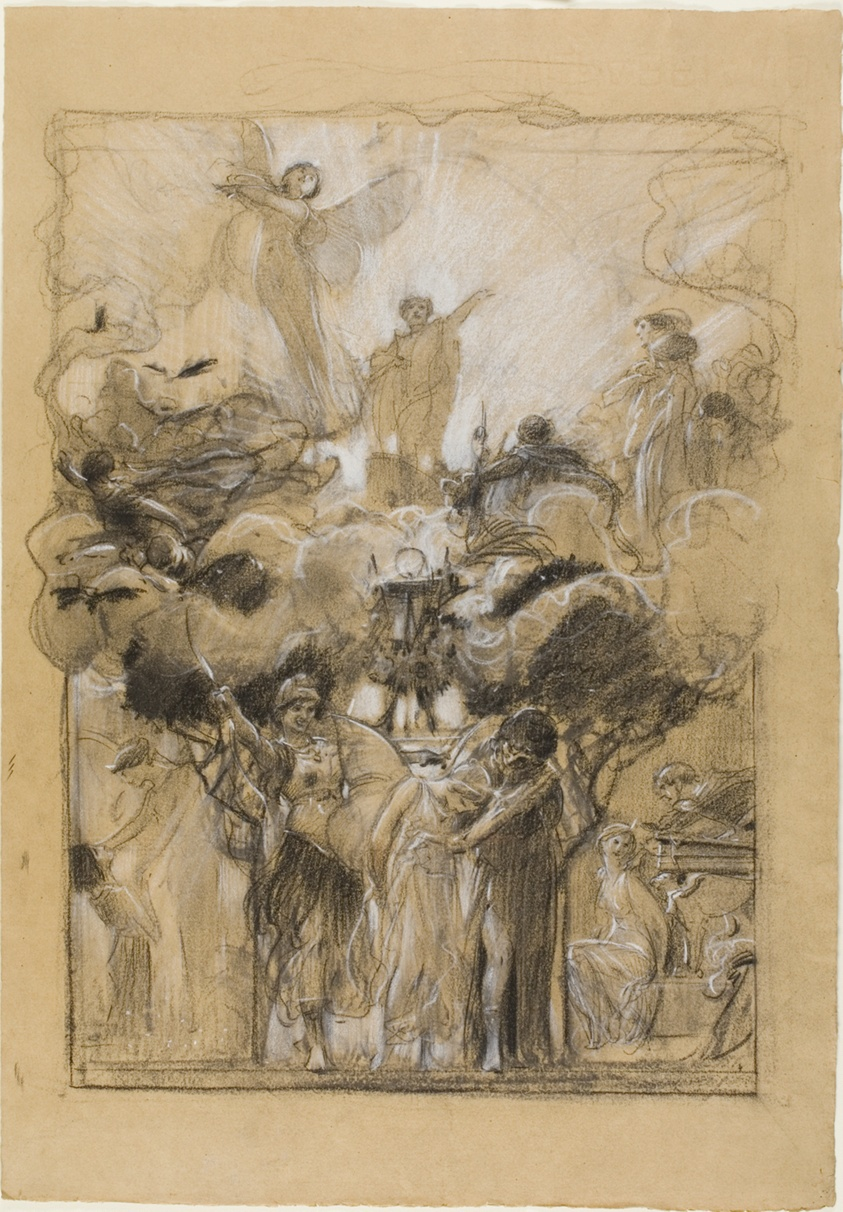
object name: Drawing and Watercolor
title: Group Composition from Fantasia Enchained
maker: Adolf Hiremy-Hirschl; Hungarian, 1860-1933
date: 1873/75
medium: Charcoal and white chalk, with stumping, on tan wove paper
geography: Hungary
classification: chalk; drawings (visual works); prints and drawing